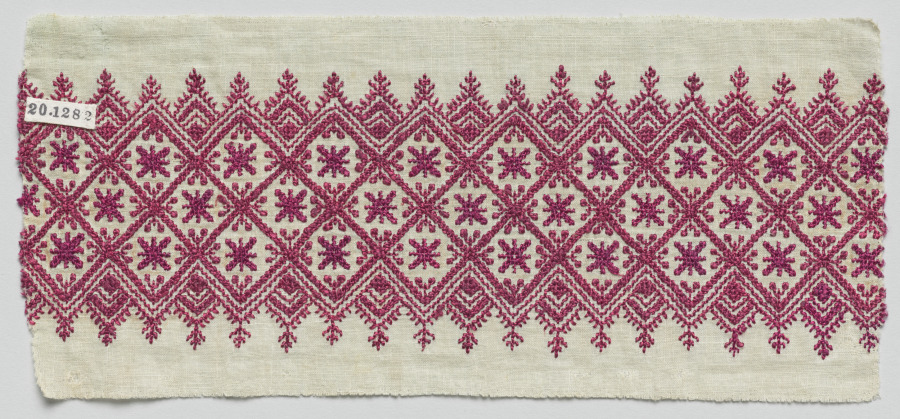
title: Fragment of a furnishing textile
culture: Africa, North Africa, Morocco, Fes, Moroccan embroiderer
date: 1700s–1800s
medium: Cotton, silk, dye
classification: Embroidery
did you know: Myrta Leonora Jones, the donor of this work, was a women’s rights activist in Cleveland in the early 20th century.